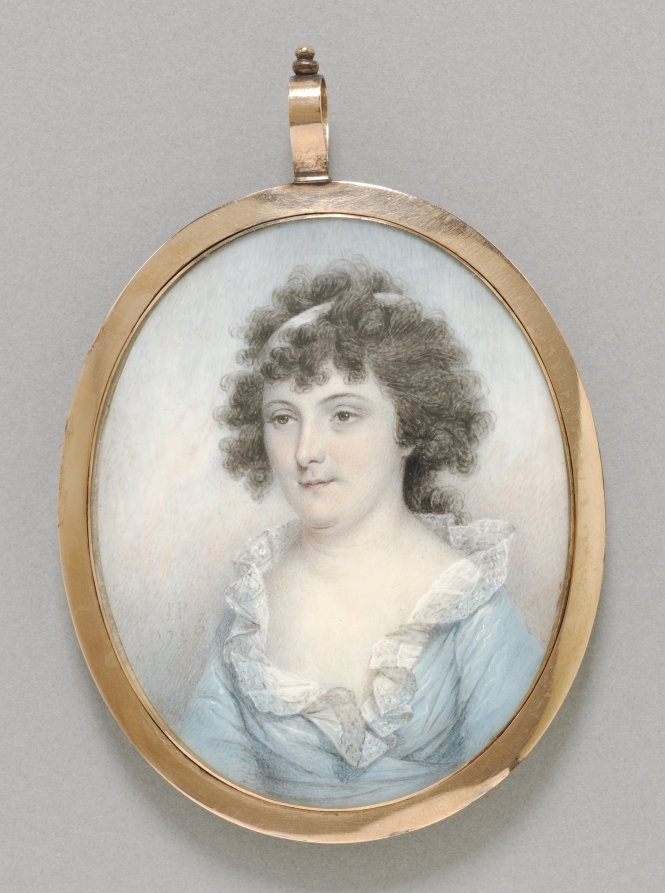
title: Portrait of Susan Coren Towers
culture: America, late 18th Century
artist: James Peale (American, 1749–1831)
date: 1796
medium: watercolor on ivory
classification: Portrait Miniature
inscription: signed lower left: I P / 1796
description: Susan Coren Towers was the daughter of a major in the Revolutionary War, and her husband was a successful woolen goods manufacturer. While little is known about Towers outside of her husband’s and father’s pursuits, Peale painted her with slightly asymmetrical clothing, bouncy curls, and a slight smirk, possible hints at her personality. While many portrait miniatures have compartments containing the sitter’s hair, this example holds hair from two individuals, likely Towers and a loved one.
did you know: Online fans of the Broadway musical Hamilton have frequently misidentified this image as a portrait of Peggy Schuyler, Alexander Hamilton’s sister-in-law.